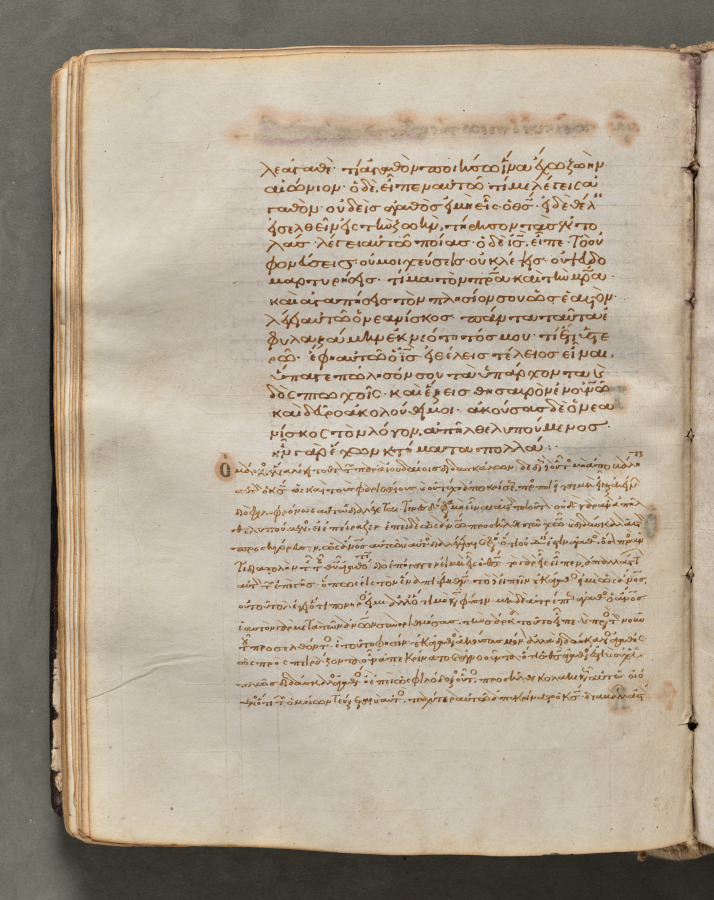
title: Text, folio 85 (verso), from a Gospel Book with Commentaries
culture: Byzantium, Constantinople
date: c. 1000–1100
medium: ink, tempera, and gold on vellum; leather binding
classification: Bound Volume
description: Each of the four gospels in this book opens on a page with brilliantly illuminated borders depicting the author of the text as well as birds-principally peacocks, symbols of the immortality of the soul-and fountains, representing the fountain of life and the salvation of the soul. This volume consists of 428 leaves with texts in Greek. Its level of sophistication suggests that it was probably written and decorated in a monastery in Constantinople.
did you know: Gospel Books were carried in procession through Byzantine churches.